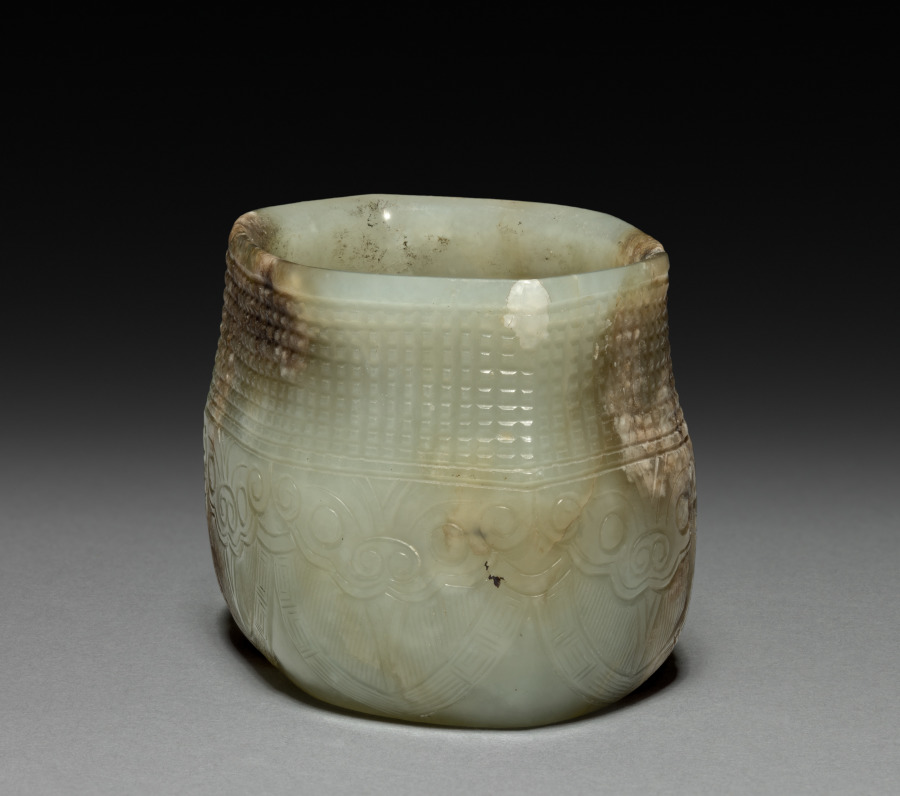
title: Cup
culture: China, Song dynasty (960-1279)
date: 960– 1279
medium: jade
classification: Jade